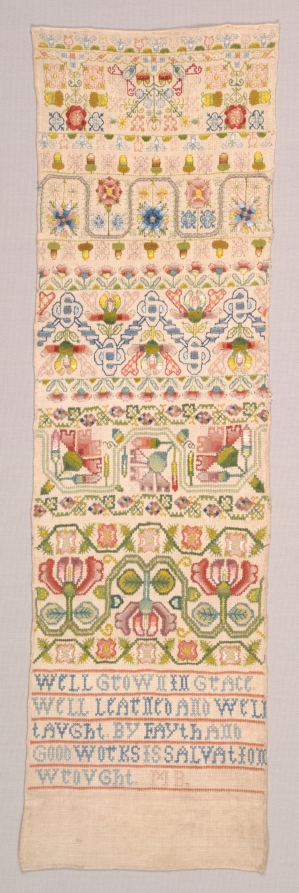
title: Long Sampler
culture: England, 17th century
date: c. 1650–70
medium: embroidery: silk on linen tabby ground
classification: Sampler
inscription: below: "WELL GROWN IN GRACE/ WELL LEARNED AND WELL/ TAUGHT BY FAYTH AND/ GOOD WORKS IS SALVATION/ WROUGHT. M B."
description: Samplers were created as a mark of achievement in needlework by young ladies as they progressed in their education. Because they display levels of skill and technique, samplers often include figurative or scenic decoration along with the alphabet and various horizontal and vertical patterns that could serve as guides for future stitching. Most samplers reveal the pride of a young lady as she showed off her considerable accomplishment in sewing and were treasured from generation to generation.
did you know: Long samplers from England in the 1600s often reproduced or adapted designs from earlier pattern books for needlework.